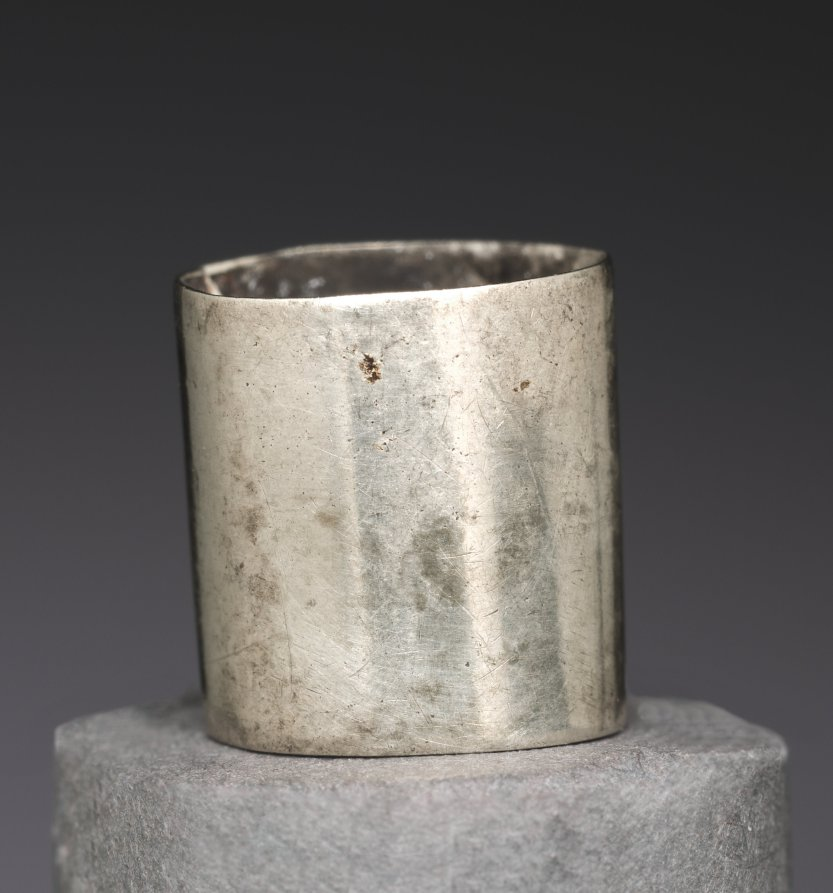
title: Element of Wig Decoration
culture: Egypt, Middle Kingdom (2040–1648 BCE), Dynasty 12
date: 1980–1801 BCE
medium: silver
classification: Jewelry